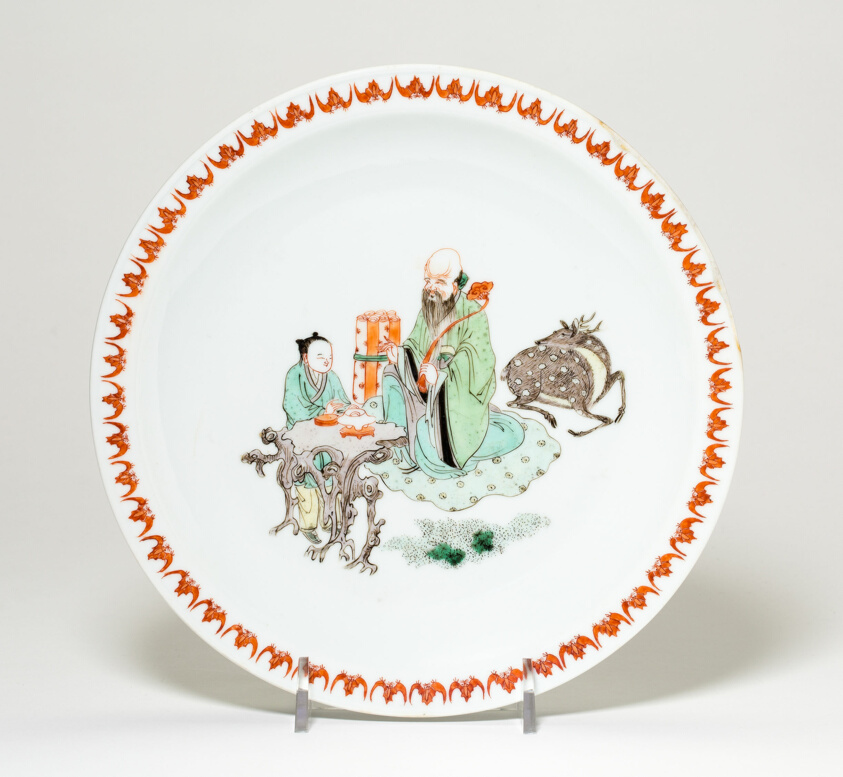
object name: Vessel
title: Plate with Shou Lao (the God of Longevity), Attendant, and Deer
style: Chinese (culture or style)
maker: China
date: Qing dynasty (1644–1911), Kangxi reign mark and period (1662–1722)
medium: Porcelain with overglaze famille verte enamel decoration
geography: China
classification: plate (general, dish); porcelain; dish (vessel); asian art; ceramics; vessel